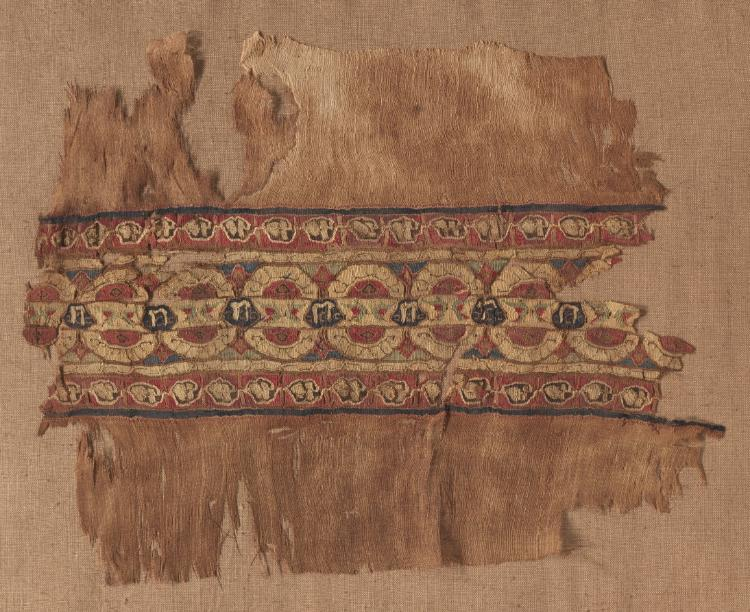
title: Fragment of a Tiraz-Style Textile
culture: Egypt, Fatimid period, 12th century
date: 1100s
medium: tabby ground with inwoven tapestry ornament; linen and silk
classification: Textile